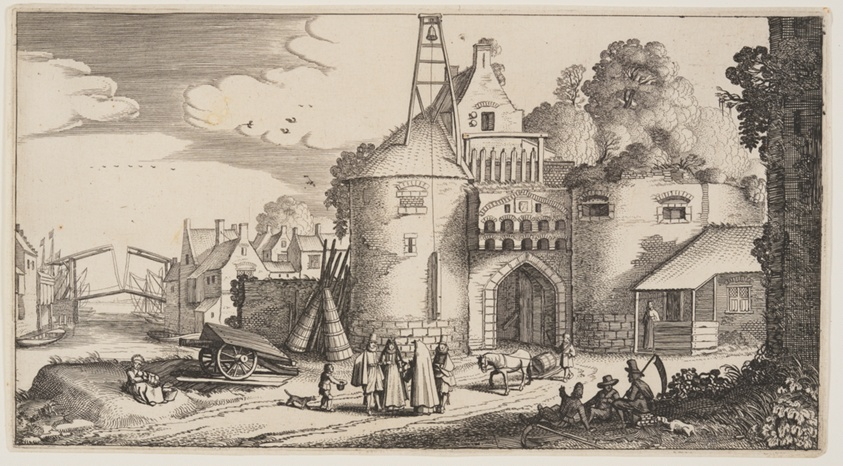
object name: Print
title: Town Gate, from Landscapes (Playsante Lantschappen)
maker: Attributed to Claes Jansz. Visscher II (Dutch, 1586-1652); after Jan van de Velde II (Dutch, c. 1593-1641)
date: c. 1641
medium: Etching, with engraving, on ivory laid paper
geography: Netherlands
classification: etching; paper; print; prints and drawing